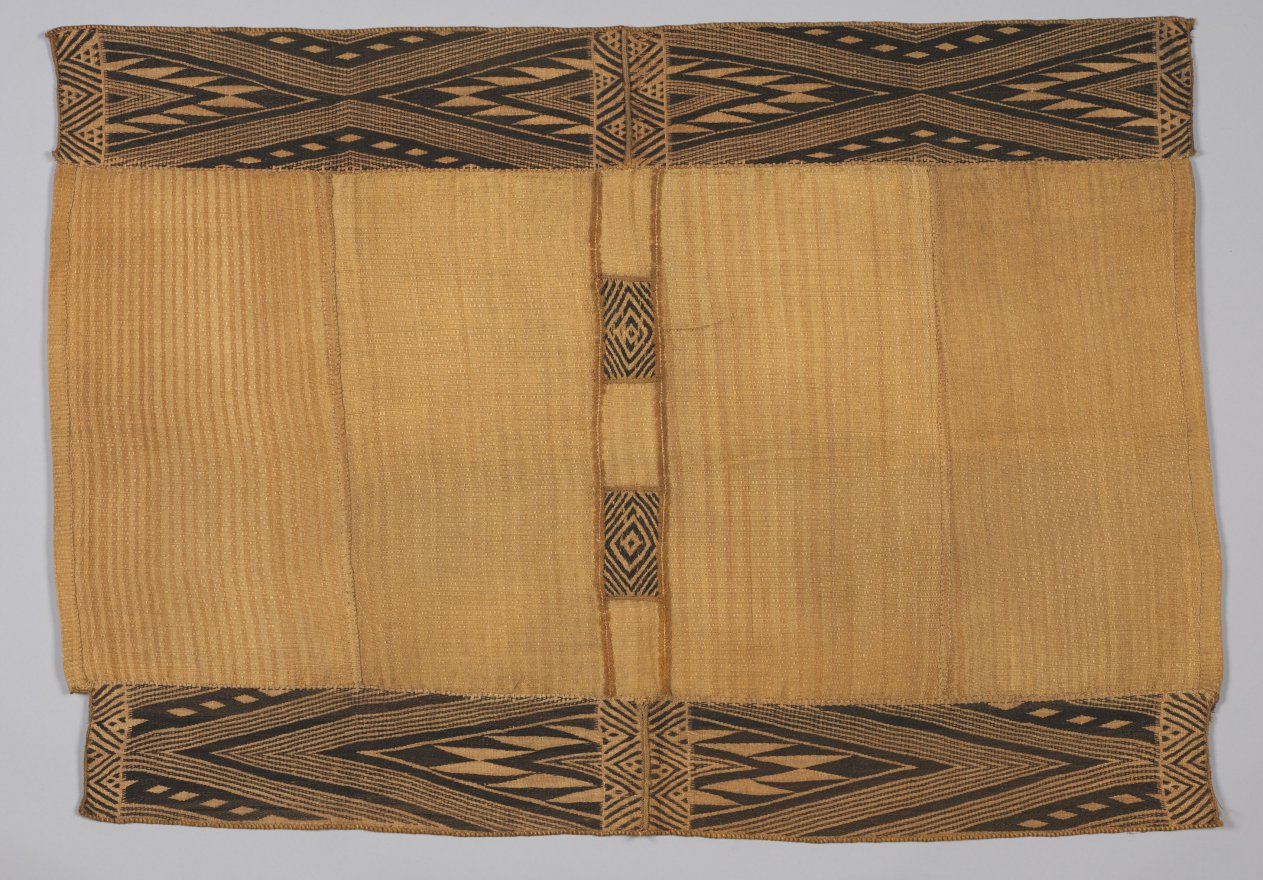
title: Woman's Skirt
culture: Africa, Central Africa, Democratic Republic of Congo, Mbuun-style weavers and embroiderers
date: late 1800s–about 1906–12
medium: Raffia palm fiber (Raphia ruffia or R. vinifera) and dye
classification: Garment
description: Mbuun men wove and embroidered wrap skirts like this for women to wear on special occasions. Gently color-shifted patterns (lubawa) along the central panels were achieved by “floating” wefts (selectively covering over vertical, or warp, threads with horizontal, or weft, threads). In contrast, various black-brown embroidered diamonds cover the borders. These are called lobubasa, motifs also seen on cicatrices (ornamental scars) that once beautified women’s bodies. Short tufts running horizontally and vertically across the textile were created by inserting extra fibers, then cutting and fluffing them with a knife. These add texture and hide the seams between woven panels.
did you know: The diamond motifs on this skirt have symbolic and cosmological links to lizards (mbil), an animal associated with matrilineal (female descent) clans.